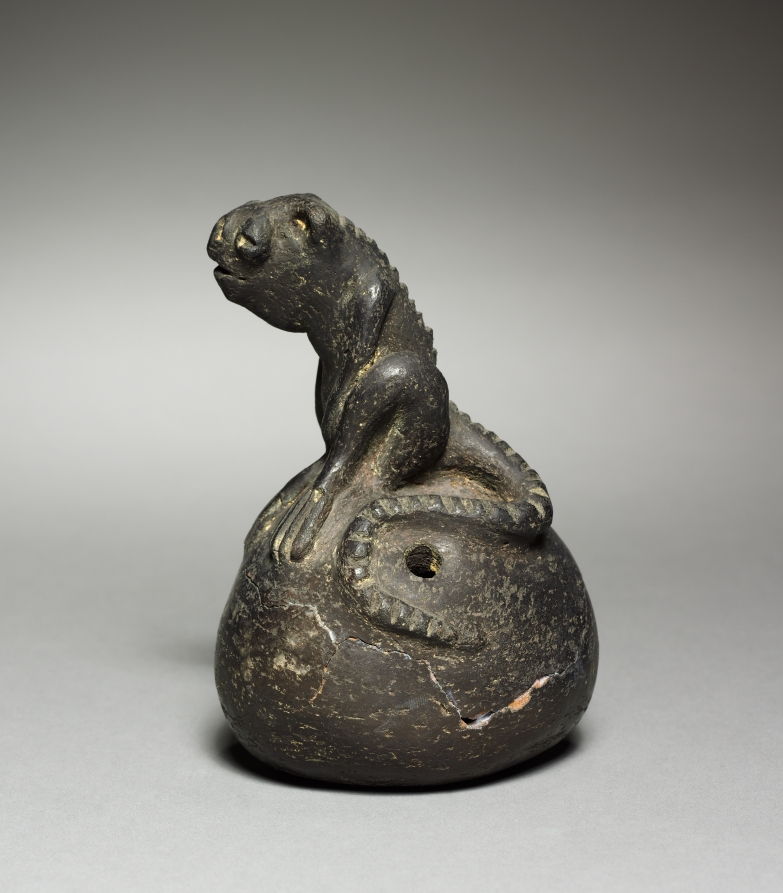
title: Figurine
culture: Colombia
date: before 1921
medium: pottery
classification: Ceramic